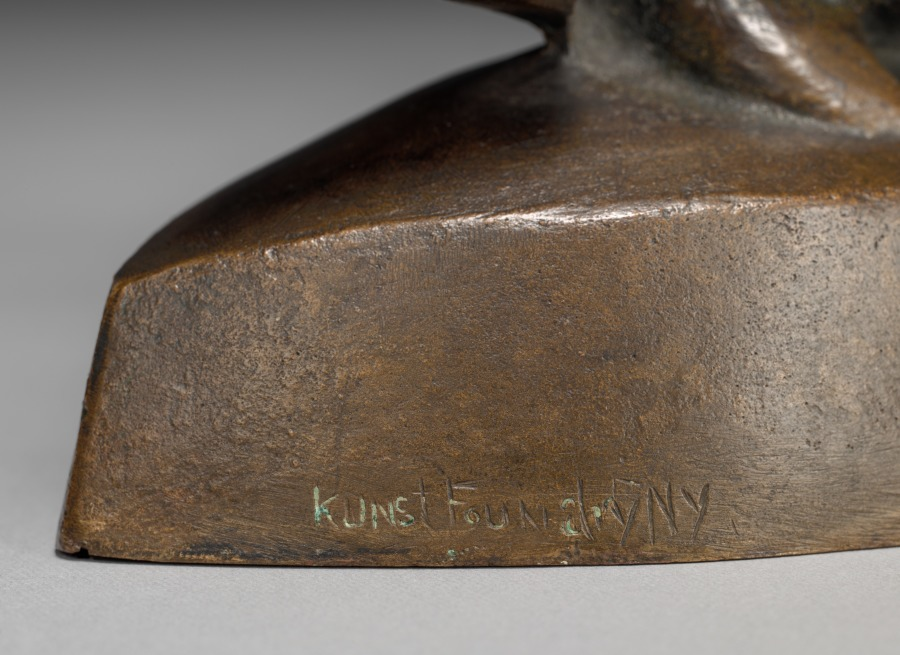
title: Russian Dancer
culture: America, Ohio, Cleveland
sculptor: Alexander Blazys (American, born Russian Empire [now Lithuania], 1894–1963)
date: 1925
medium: bronze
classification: Sculpture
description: A Lithuanian immigrant, Blazys introduced modernist sculpture to Cleveland upon his arrival in 1925. These figures merge rhythmic movement inspired by music with faceted, geometric planes derived from Cubism.